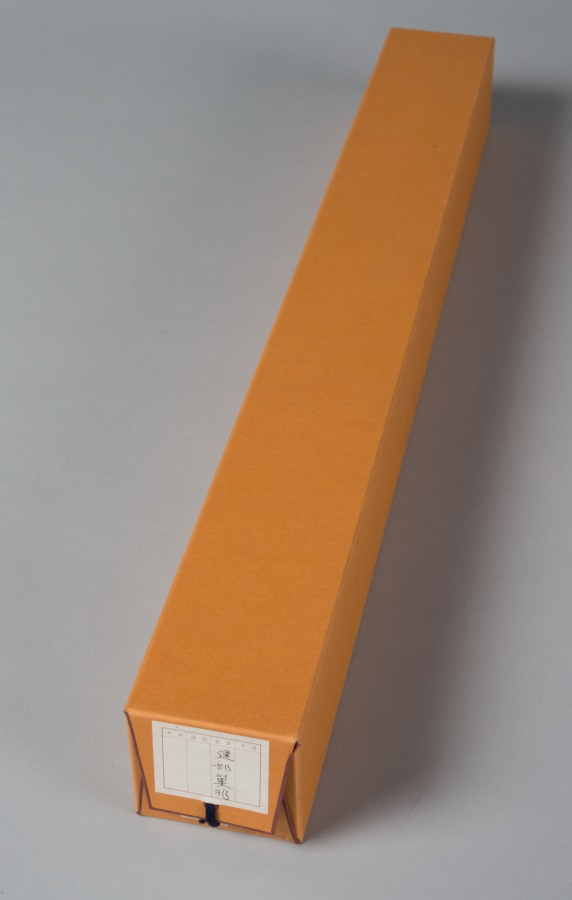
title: Genre Figures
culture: Japan, Edo period (1615–1868)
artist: Takebe Sōchō (Japanese, 1760–1814)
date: c. 1816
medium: hanging scroll; ink and color on paper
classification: Painting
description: Though rarely mentioned in official histories, Socho was an accomplished painter whose talent is readily apparent to the modern eye. For his compositions he chose traditional Japanese stories or everyday events. This painting belongs to a triptych (set of three) that was recently converted from folding screen panels to hanging scrolls.